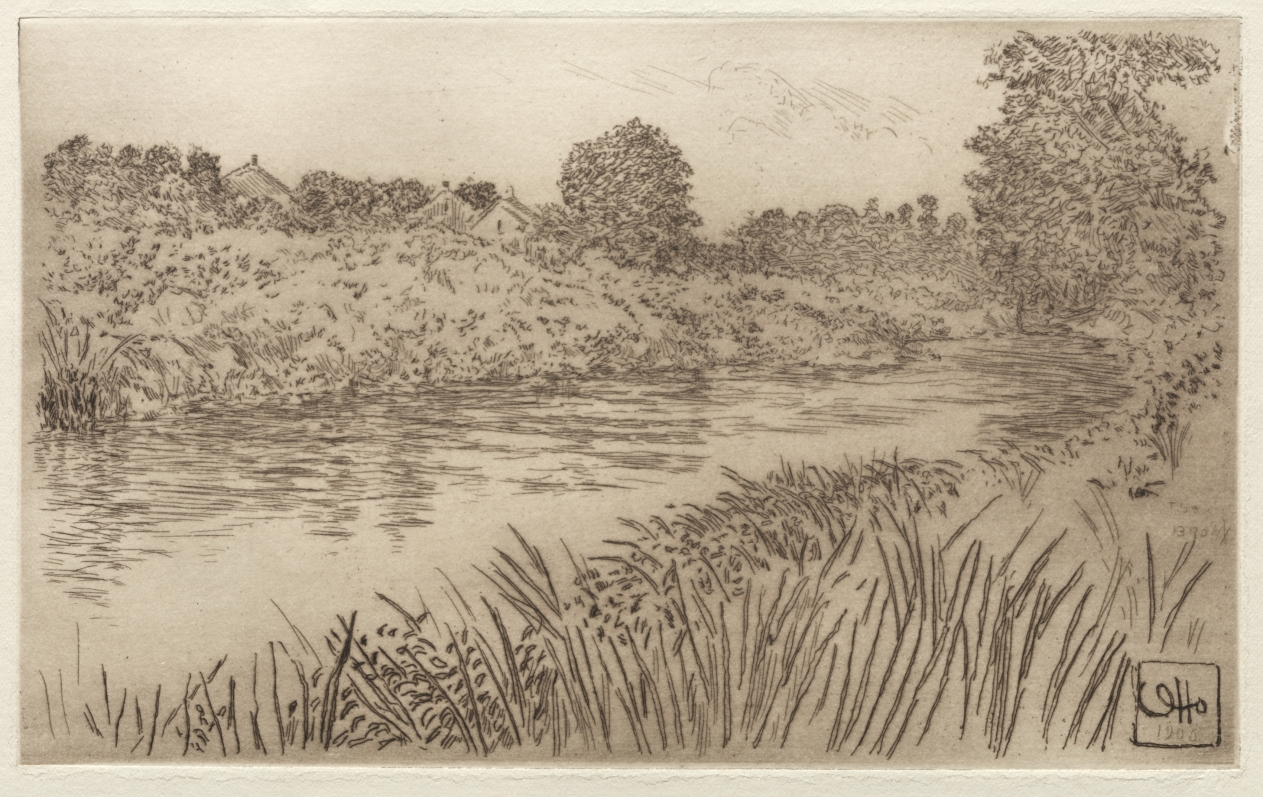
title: On the Bronx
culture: America, early 20th Century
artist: Otto H. Bacher (American, 1856–1909)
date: 1906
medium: etching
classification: Print